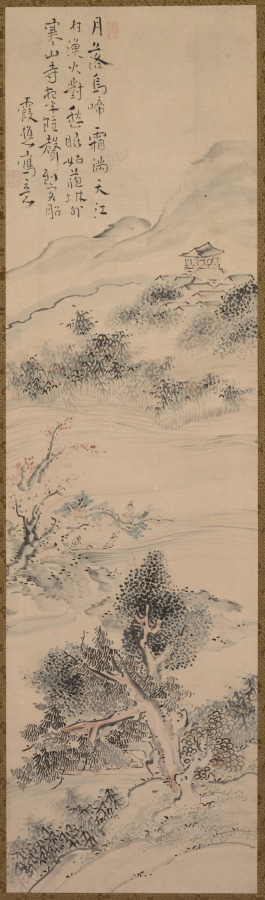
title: Illustration of Zhang Qi's Poem on the Cold Mountain Temple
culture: Japan, Edo period (1615–1868)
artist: Ike Taiga (Japanese, 1723–1776)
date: mid- to late 1700s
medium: hanging scroll; ink and color on paper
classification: Painting